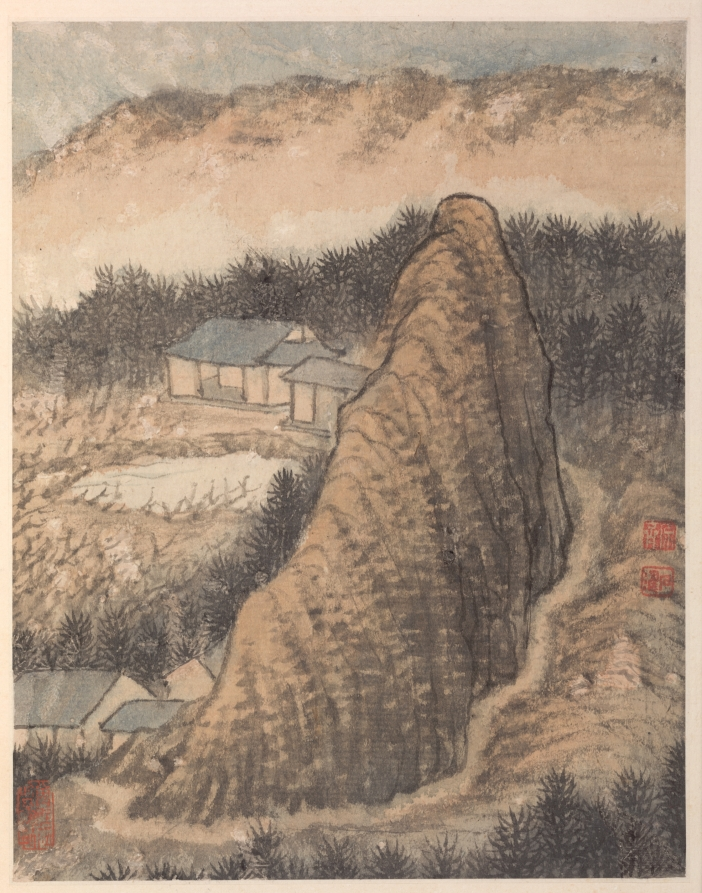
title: Reminiscences of Qinhuai River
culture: China, Qing dynasty (1644-1911)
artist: Shitao (Chinese, 1642–1707)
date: 1642–1707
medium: album leaf, ink and color on Song paper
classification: Painting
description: Shitao’s skillfully rendered composition suggests a sweeping movement from the base of the central rising mass, silhouette of forest, and a bright bend of misty atmosphere under the distant hills, to form almost a continual circle of energy—a gentle vortex. That is a perfect embodiment of the early Qing ideal of a momentous flow, with suggestion of the subterranean veins and linkages.